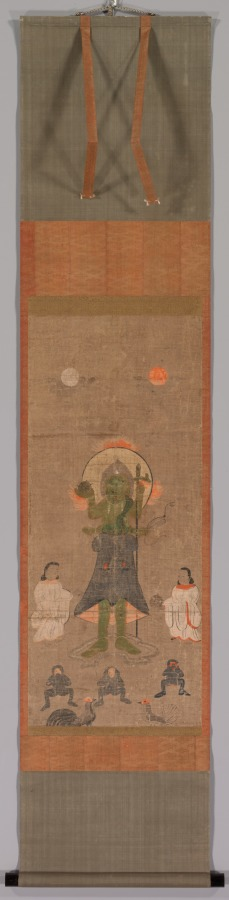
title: Shomen Kongo: The Blue-Faced Kongo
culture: Japan, Edo period (1615–1868)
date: 1615–99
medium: hanging scroll; ink and color on paper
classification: Painting